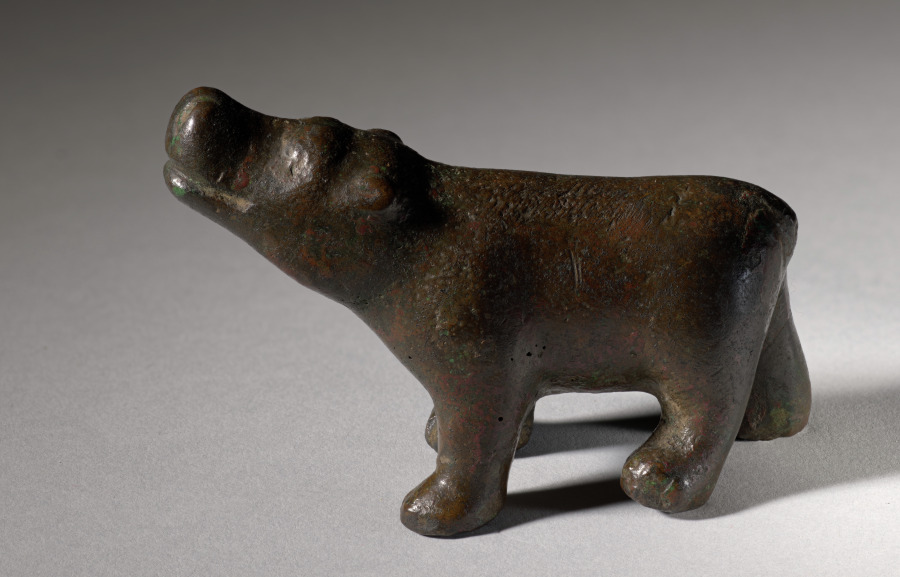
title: Hippopotamus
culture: Italy, Rome, Greco-Roman Period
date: 332 BCE–395 CE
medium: bronze, solid cast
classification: Sculpture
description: This hippopotamus steps forward with its rear left leg lifted off the ground and its head arched upwards. The hippopotamus was a Nilotic animal associated with Egypt and the Nile River that was brought to Rome and put on display in the Colosseum as part of venationes, or wild beast hunts. The rise of “Egyptomania” in the Roman Empire surged under the emperor Hadrian (reigned AD 117–38). Extant Egyptian examples of hippopotamus figurines are less animated and made of materials such as stone or pottery rather than bronze, making the pose and materiality of this object distinctly Greco-Roman.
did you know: The word hippopotamus is a Greek compound word combining “horse” (hippos) and “river” (potamos).